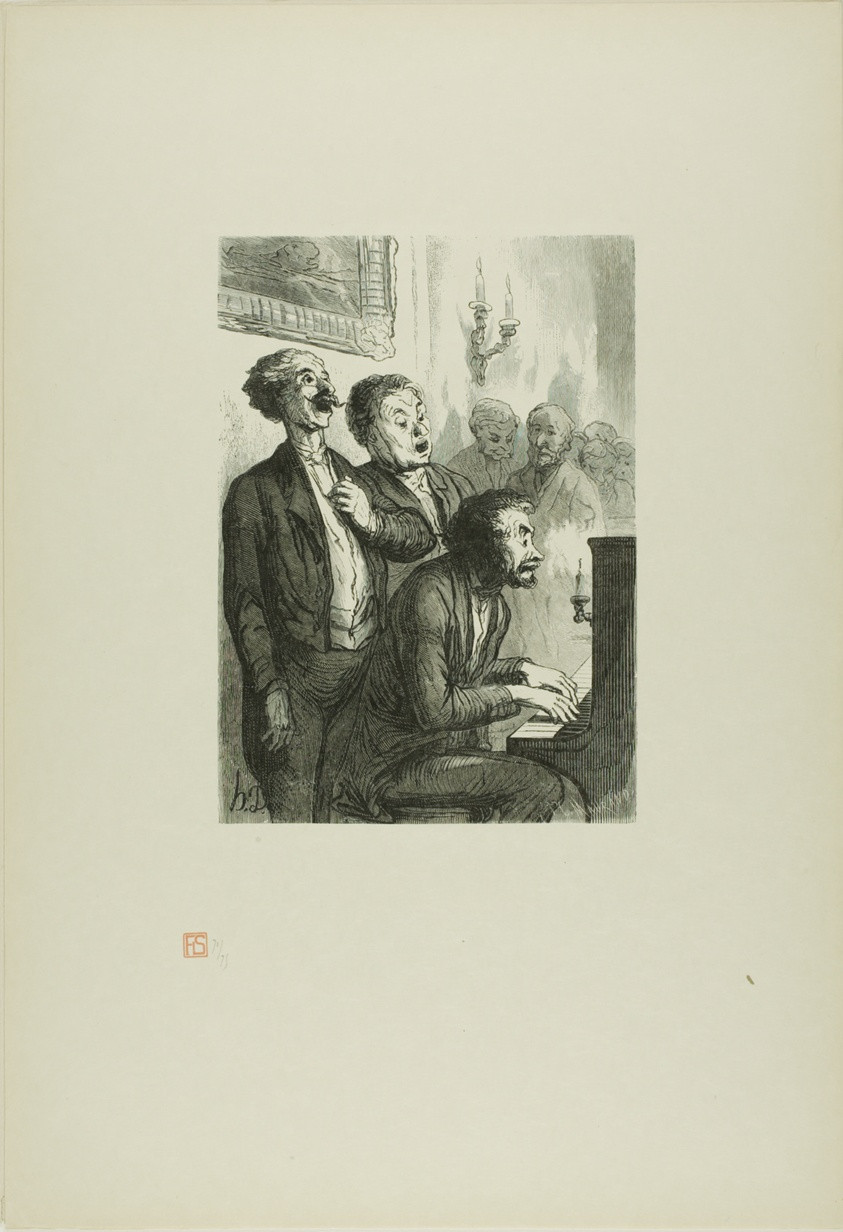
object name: Print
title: The Chamber Musicians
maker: Charles Maurand (French, 1824-1904); after Honoré Victorin Daumier (French, 1808-1879); printed by François Louis Schmied (Swiss, 1873-1941); published by Jules Meynial (French, 20th century)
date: 1862, printed 1920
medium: Wood engraving on cream Japanese paper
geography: France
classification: wood engraving; print; prints and drawing